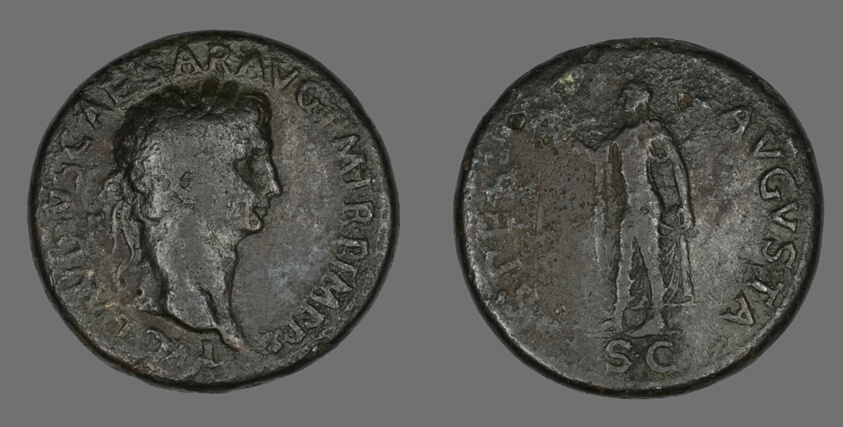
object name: Coin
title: Sestertius (Coin) Portraying Emperor Claudius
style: roman (ancient, style or period)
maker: Roman, minted in Rome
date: 50-54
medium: Bronze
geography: Roman Empire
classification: coin; ancient art